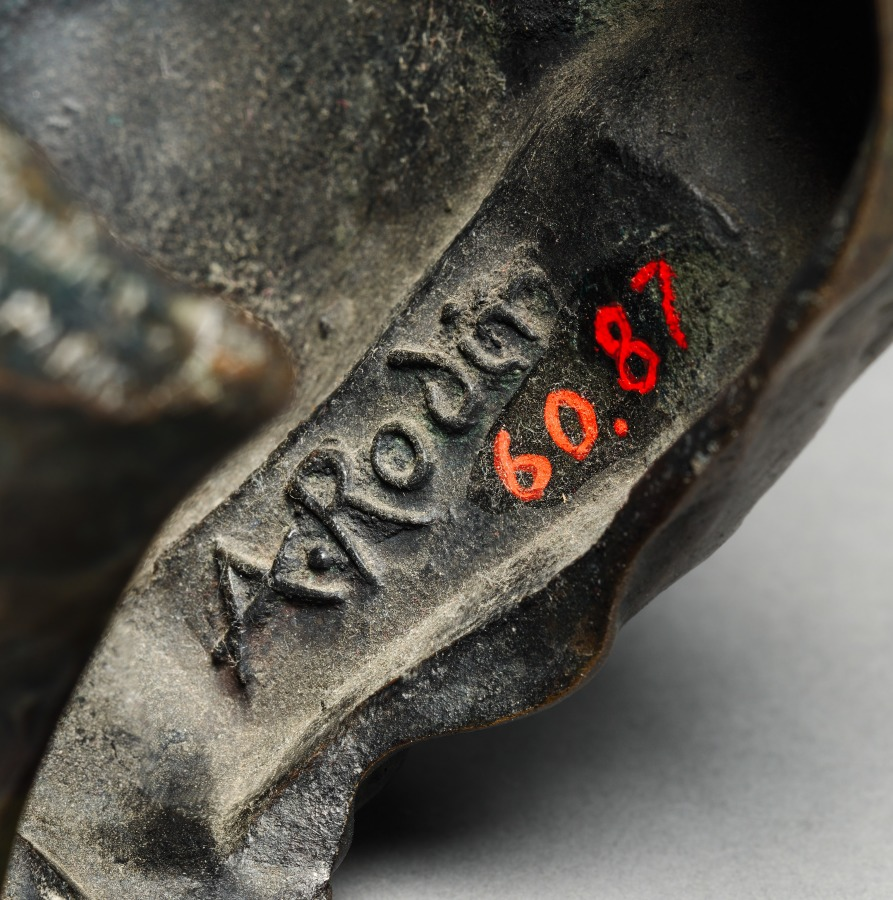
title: Mask of Séverine (Caroline Rémy)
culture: France, 19th century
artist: Auguste Rodin (French, 1840–1917)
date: 1893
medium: bronze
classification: Sculpture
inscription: Signed sinister side of neck: "A. Rodin"; inside dexter side in relief: "A. Rodin"